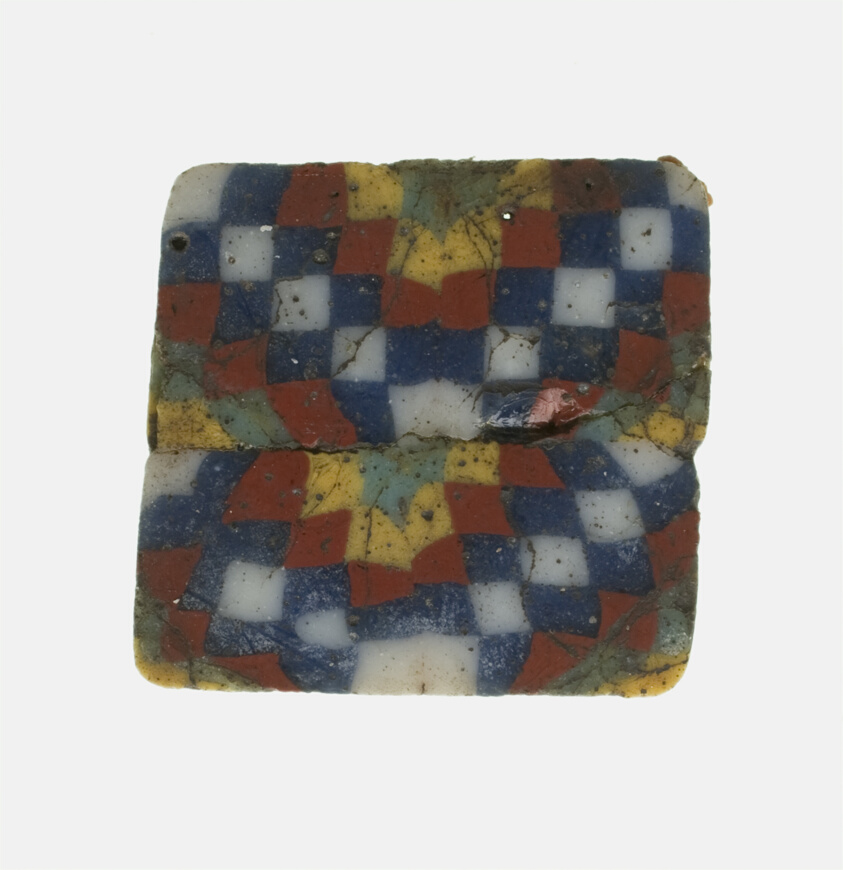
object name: Decorative Arts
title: Group of Checkerboard Patterned Inlays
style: egyptian, ptolemaic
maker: Egyptian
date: Ptolemaic Period, (1st century BCE)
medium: Glass, mosaic technique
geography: Italy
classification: glass; inlay; ancient art; decorative arts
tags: geometric, checkerboards